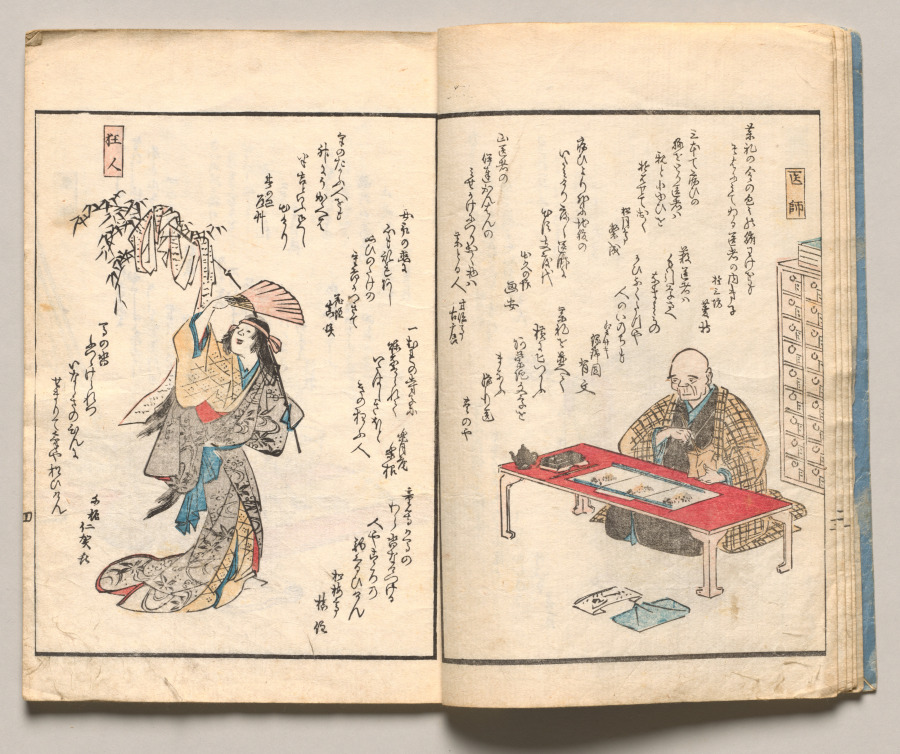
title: Spread Five from Volume One of People of Japan in Light Verse (Kyōka)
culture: Japan, Edo period (1615–1868)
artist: Utagawa Hiroshige (Japanese, 1797–1858)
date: 1857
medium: Woodblock-printed book; ink and color on paper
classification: Bound Volume